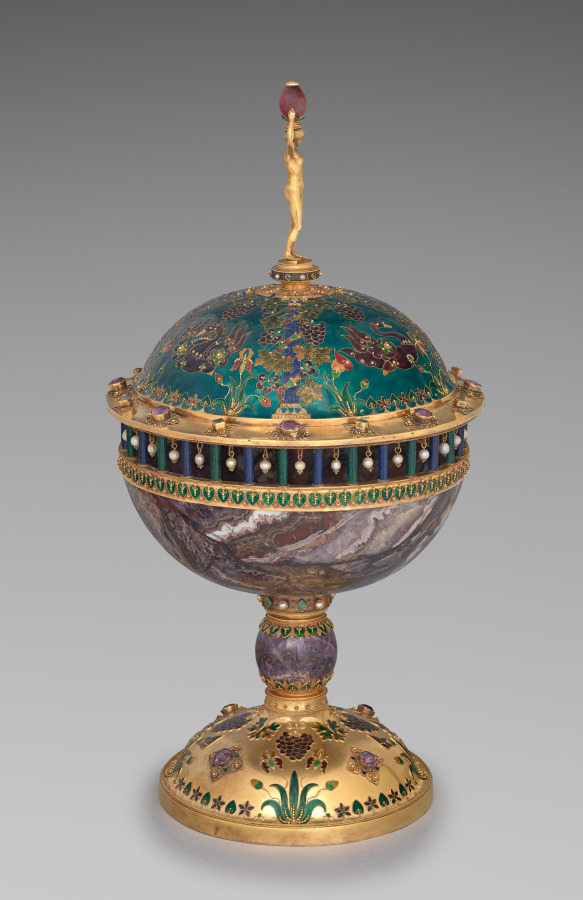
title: Covered Cup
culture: France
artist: Armand Point (French, 1861–1932)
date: c. 1897–99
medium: gilt copper alloy, enamel, amethysts, emeralds, ruby, pearls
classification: Metalwork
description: Armand Point started his career as a painter, but in the late 1800s, he became increasingly interested in decorative arts. In 1896, he established the Atelier de Haute-Claire in Marlotte, a colony of artists who handmade works of art to a very high standard. This cup was made there and is particularly ornate, showcasing different materials such as metal, enamels, gemstones, and pearls, as well as goldsmithing techniques.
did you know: The cup was originally acquired by Émile Nail-Démellette, Point's old high-school friend and later his benefactor.